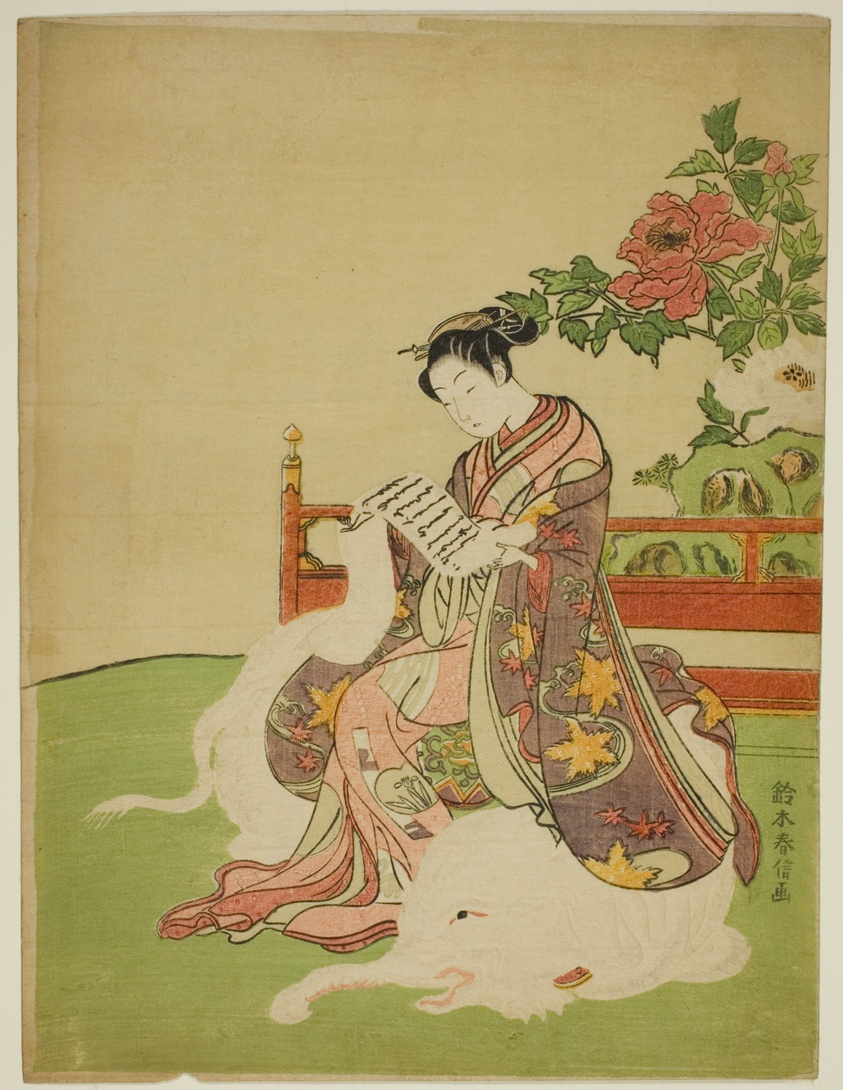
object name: Print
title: Young Woman Seated on a White Elephant (parody of the Bodhisattva Fugen)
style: Japanese (culture or style)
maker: Suzuki Harunobu 鈴木 春信; Japanese, 1725 (?)-1770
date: c. 1767/68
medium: Color woodblock print; chuban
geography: Japan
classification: woodblock print; print; asian art